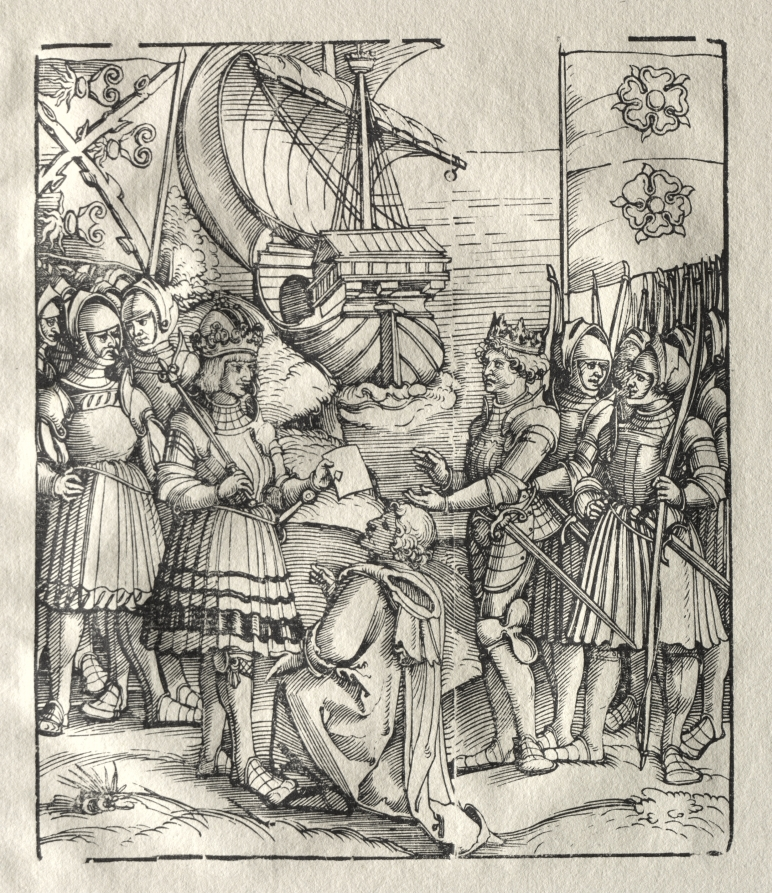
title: Maximilian Makes Peace with Henry VII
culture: Germany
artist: possibly by Peter Flötner (German, 1485–1546)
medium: woodcut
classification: Print